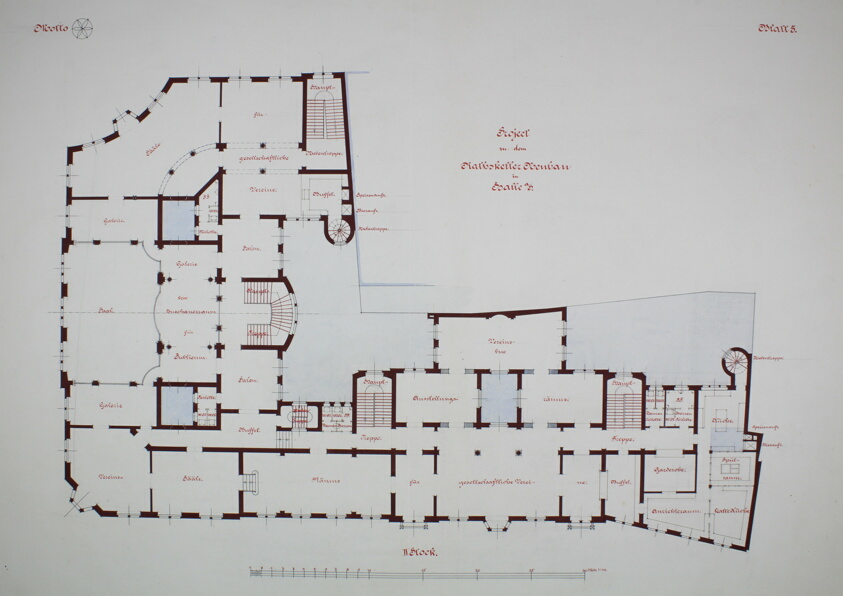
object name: Architectural Drawing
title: Rathskeller Neubau, Halle (Saale), Saxony-Anhalt, Germany, Second Floor Plan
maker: Peter J. Weber; American, born Germany, 1863-1923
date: c. 1887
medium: Graphite, ink, watercolor, and tempera on paper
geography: Saxony-Anhalt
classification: design drawing; architectural drawing